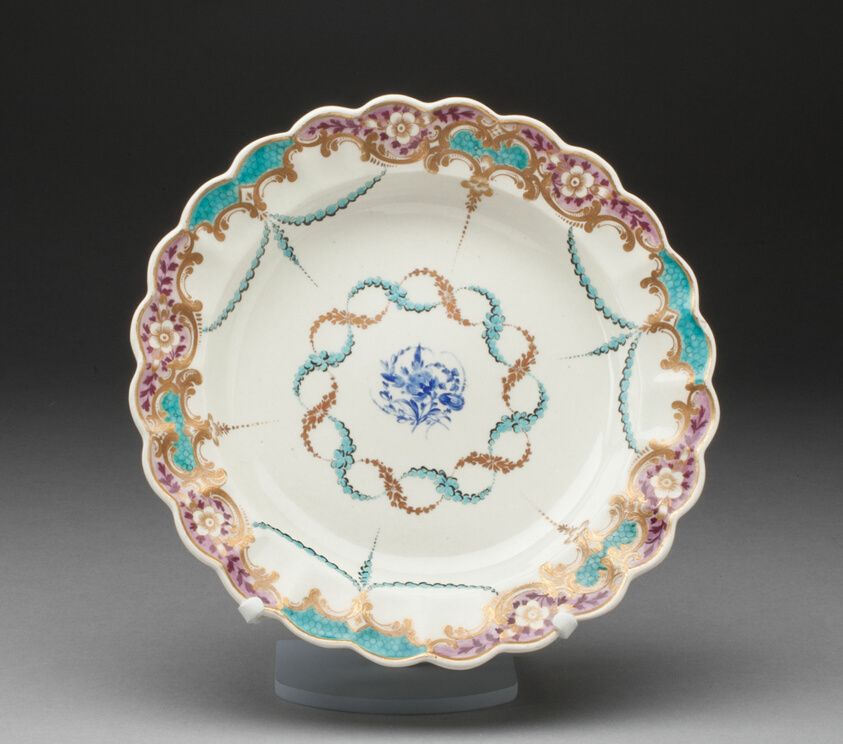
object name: Ceramics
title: Plate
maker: Worcester Porcelain Factory (Warmstry House Period, 1751–1783); Worcester, England, founded 1751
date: c. 1775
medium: Soft-paste porcelain with polychrome enamels and gilding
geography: Worcester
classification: plate (general, dish); tableware; dish (vessel); porcelain; european decorative arts; ceramics